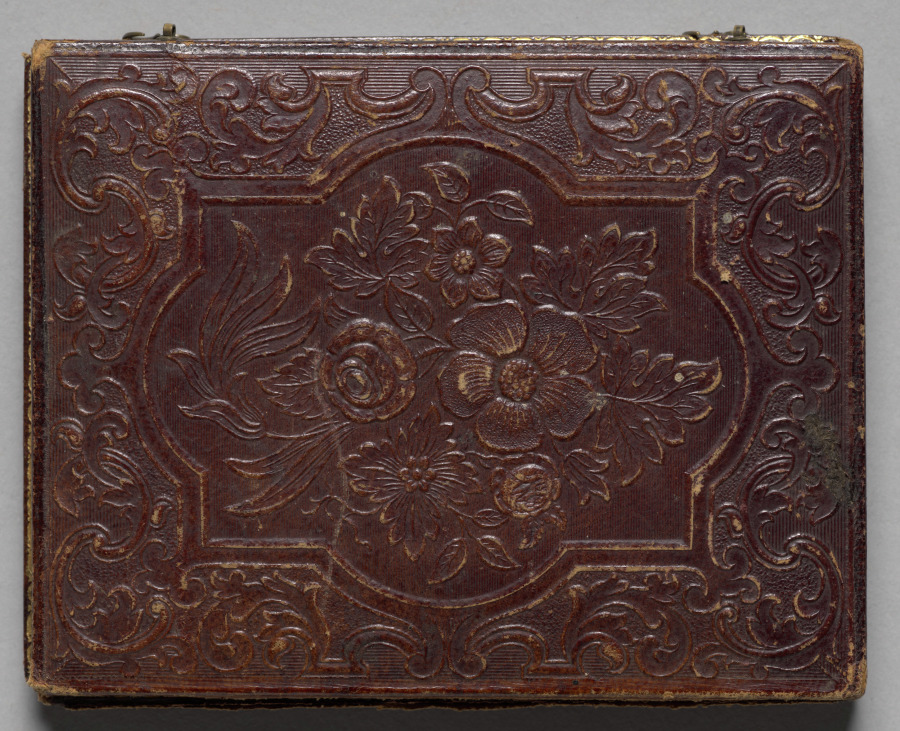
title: Prize Horse in winter, Chemung County, New York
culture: America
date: c. 1852–56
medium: daguerreotype, quarter plate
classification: Photograph